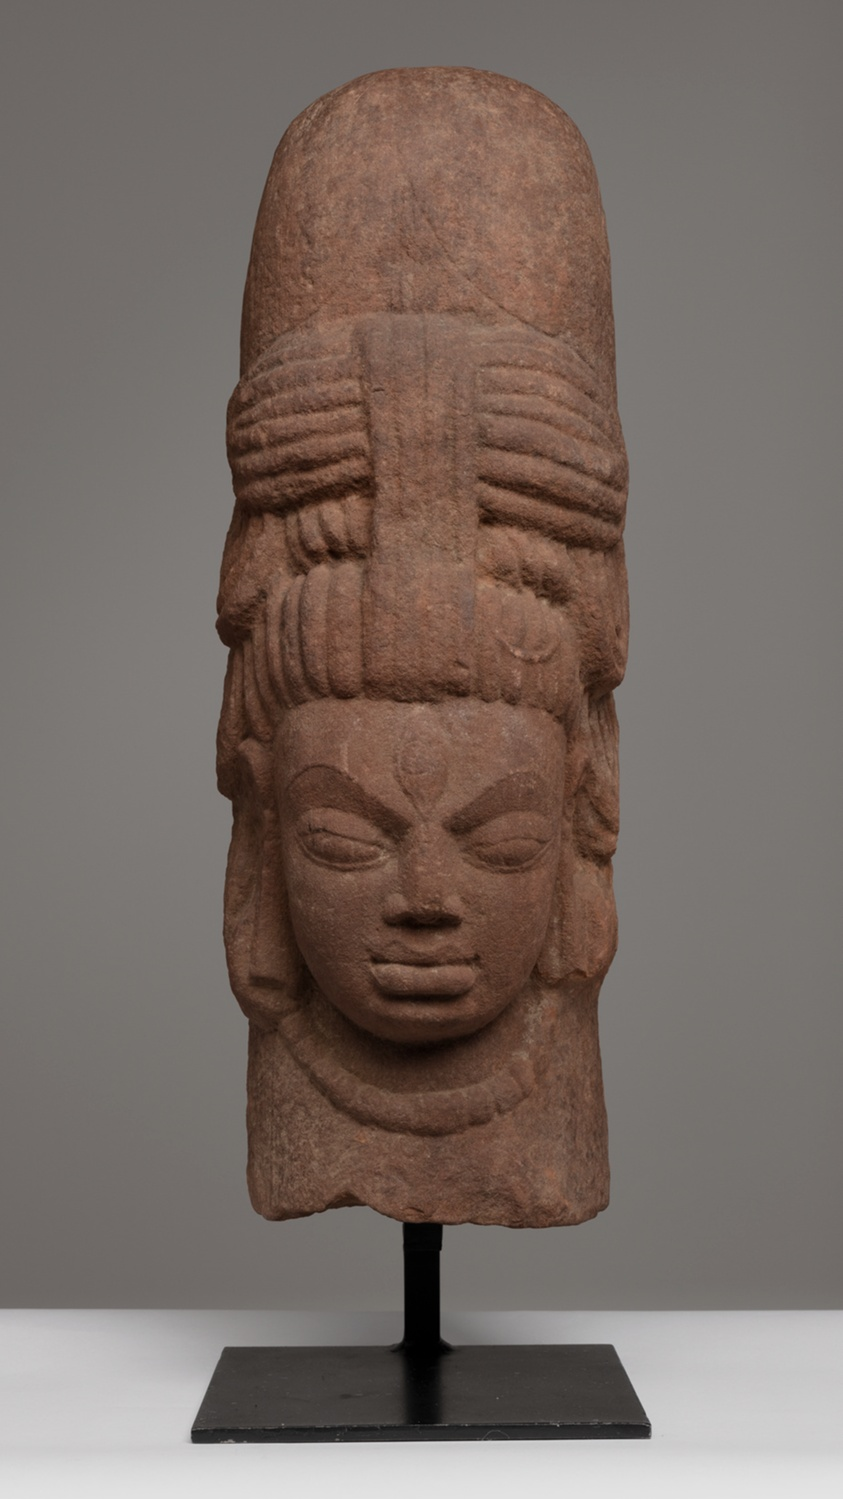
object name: Sculpture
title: Emblem of the God Shiva with One Face (Ekamukhalinga)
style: South Asian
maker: India; Madhya Pradesh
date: c. 6th century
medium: Sandstone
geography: Madhya Pradesh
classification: sandstone; stone; sculpture; asian art